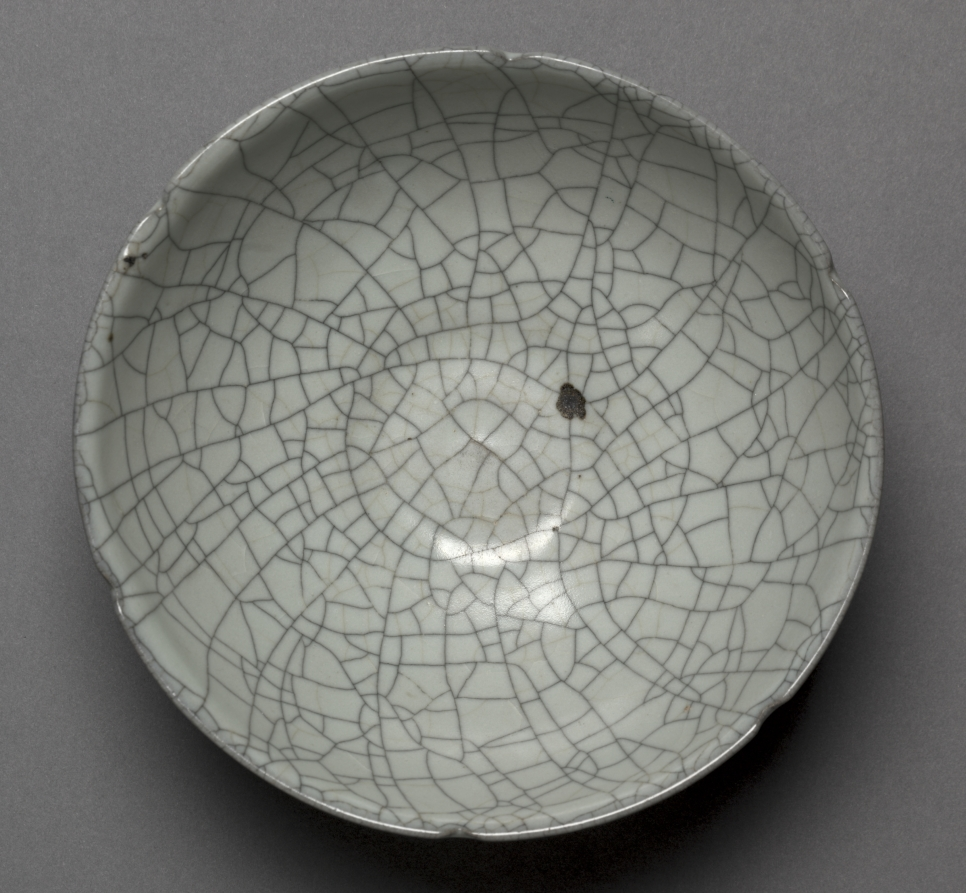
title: Sunflower Bowl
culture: China, Southern Song dynasty (1127-1279)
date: 1127–1279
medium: glazed reddish-brown porcelain, Guan ware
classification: Ceramic